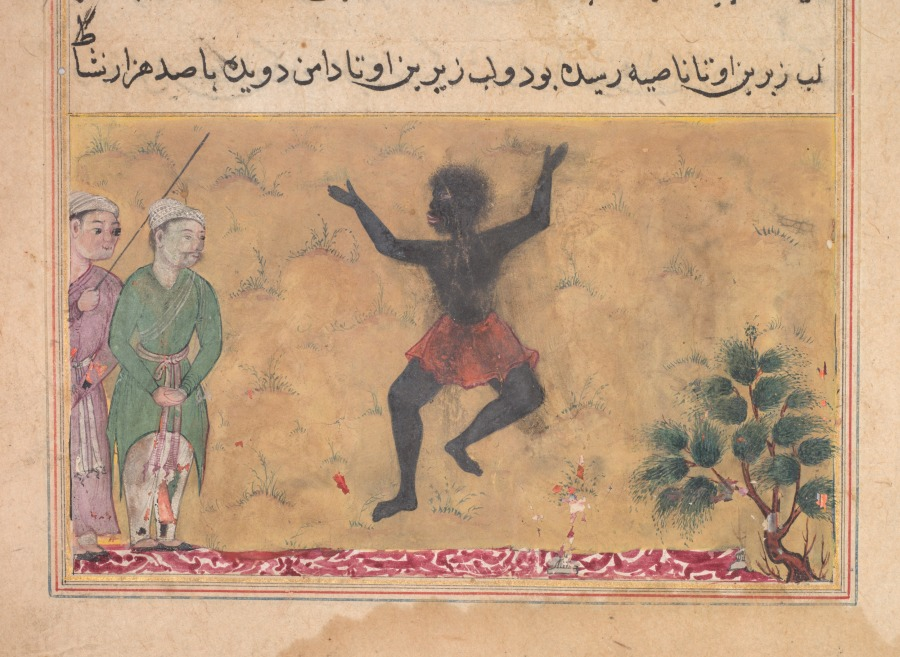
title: The court jester meets a Zangi dancing with joy, and learns from him that the cause of his happiness is his assignation with a woman who is the jester’s own wife, from a Tuti-nama (Tales of a Parrot): Twenty-second Night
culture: Mughal India, court of Akbar (reigned 1556–1605)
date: c. 1560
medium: gum tempera, ink, and gold on paper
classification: Painting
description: In the opening scene of the parrot’s bawdy story about a jester, who is shown wearing green on his way to perform at the court of the emir, he came upon an Ethiopian, known as Zangi, dancing by the side of the road. When he learned that the Zangi was overjoyed because he was planning to meet his beloved, the jester’s own wife, the jester was so distraught he was unable to perform, and the emir threw him in prison. The artist depicted the Zangi as described in the text as semi-wild with caricatured physical traits, uncovered head, and little clothing.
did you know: The tale references stereotypes about Africans that were current in India and Iran when the text was written.